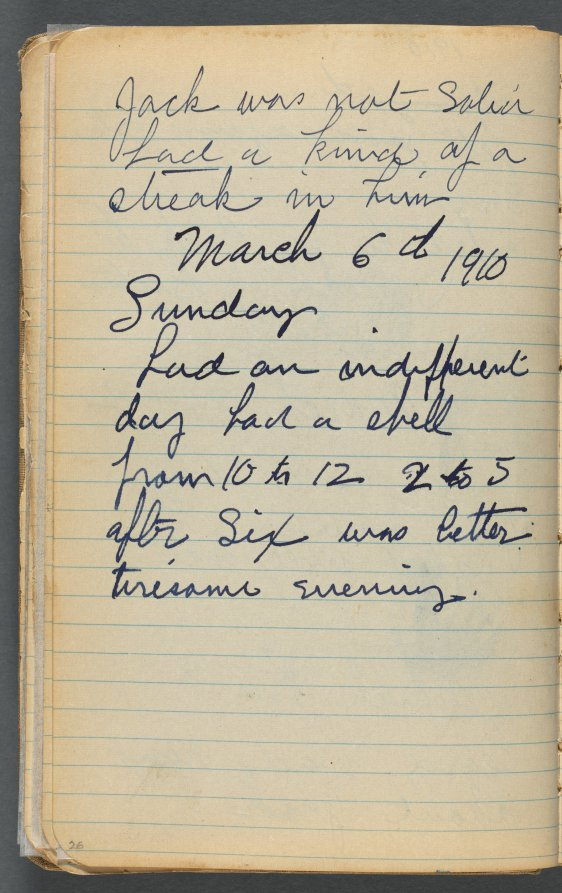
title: Sketchbook, page 026: Notes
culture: America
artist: Maurice Prendergast (American, born Newfoundland [now Canada], 1858–1924)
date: 1905–10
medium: graphite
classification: Bound Volume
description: This sketchbook contains 69 pages of drawings, a diary largely devoted to the state of the artist's health, and a three-page discourse on the nature of genius and ideas.